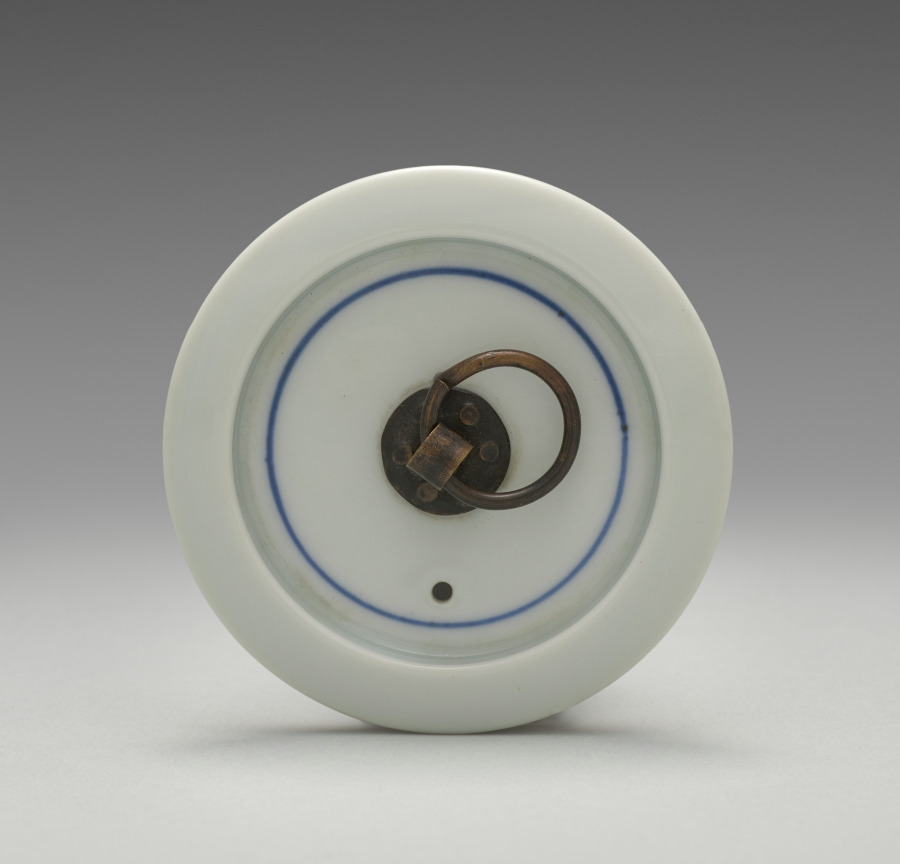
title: Lid for a Teapot with Bamboo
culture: Japan, Taishō period (1912–26)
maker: Seifū Yohei IV (Japanese, 1872–1951)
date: 1914–46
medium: Porcelain with underglaze blue, molded decoration and metal handle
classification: Ceramic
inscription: 清風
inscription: 清風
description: This teapot has a well-balanced design of bamboo in underglaze blue and nyoi staff-head motifs applied to both sides at the shoulder.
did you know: Seifū Yohei IV was the second son of Yohei III.